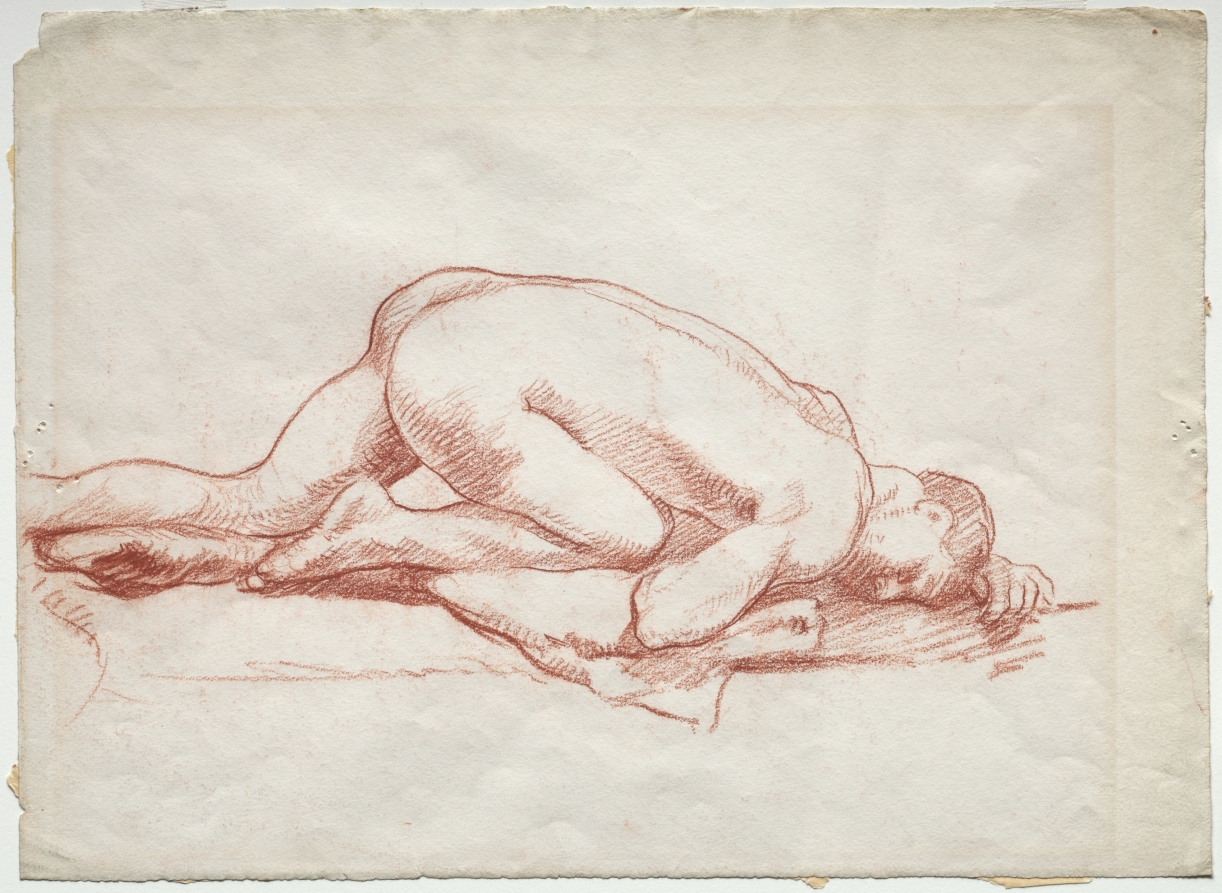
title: Crouching Male Nude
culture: England(?), 20th century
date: first half 1900s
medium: red chalk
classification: Drawing